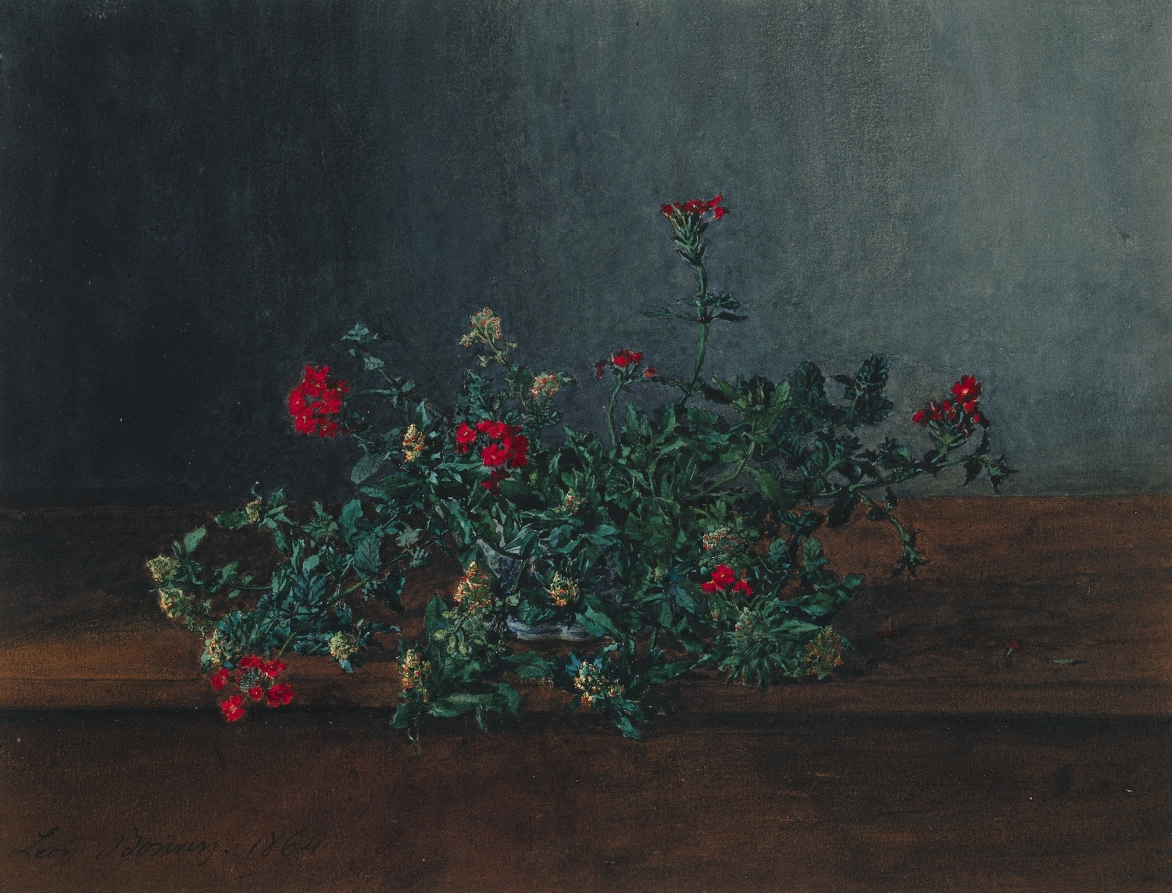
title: Still Life with Wild Flowers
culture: France, 19th century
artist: Léon Bonvin (French, 1834–1866)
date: 1864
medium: watercolor and gouache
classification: Drawing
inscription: signed, lower left, in black ink: Léon Bonvin. 1864.